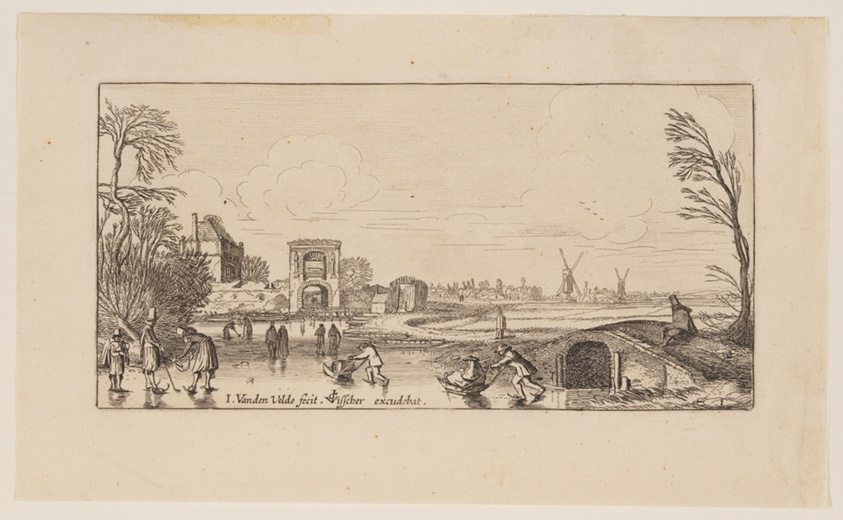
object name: Print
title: Winter Landscape, from Six Landscapes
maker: Jan van de Velde II; Dutch, c. 1593–1641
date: c. 1613-1640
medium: Etching on ivory laid paper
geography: Netherlands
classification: etching; paper; print; prints and drawing